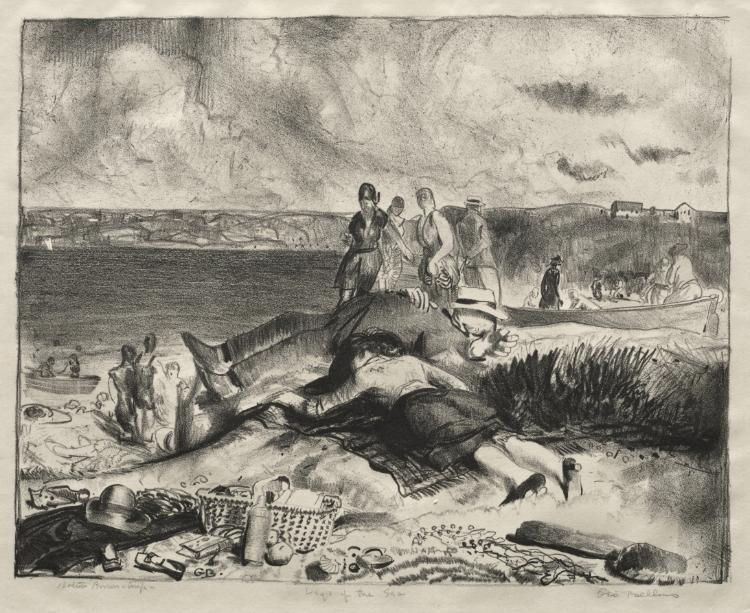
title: Legs of the Sea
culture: America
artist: George Bellows (American, 1882–1925)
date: 1921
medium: lithograph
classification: Print